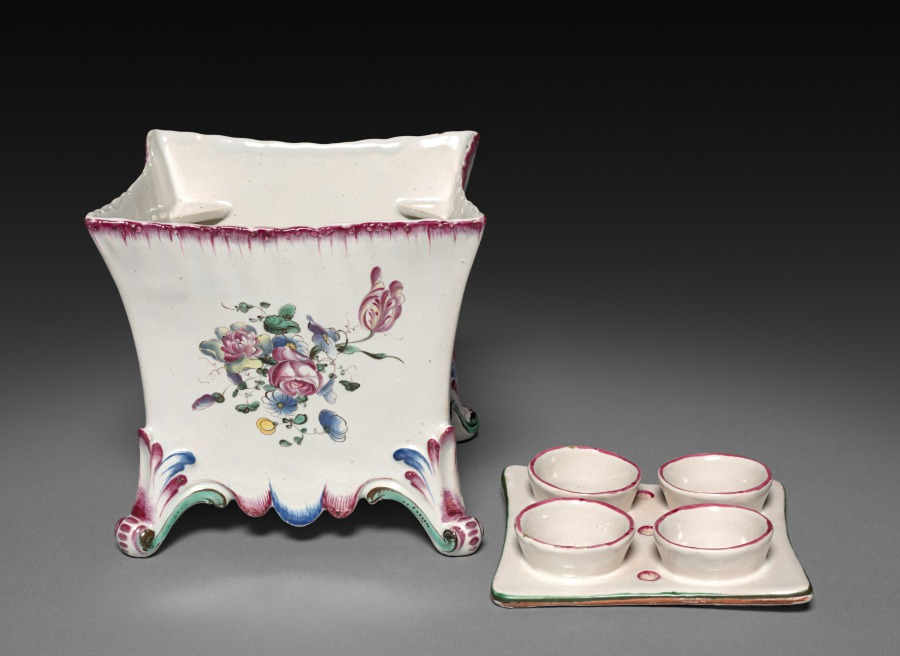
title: Flower Vase (Bouquetier)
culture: France, 18th century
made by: Aprey Pottery Factory (French)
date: c. 1775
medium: faience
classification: Ceramic